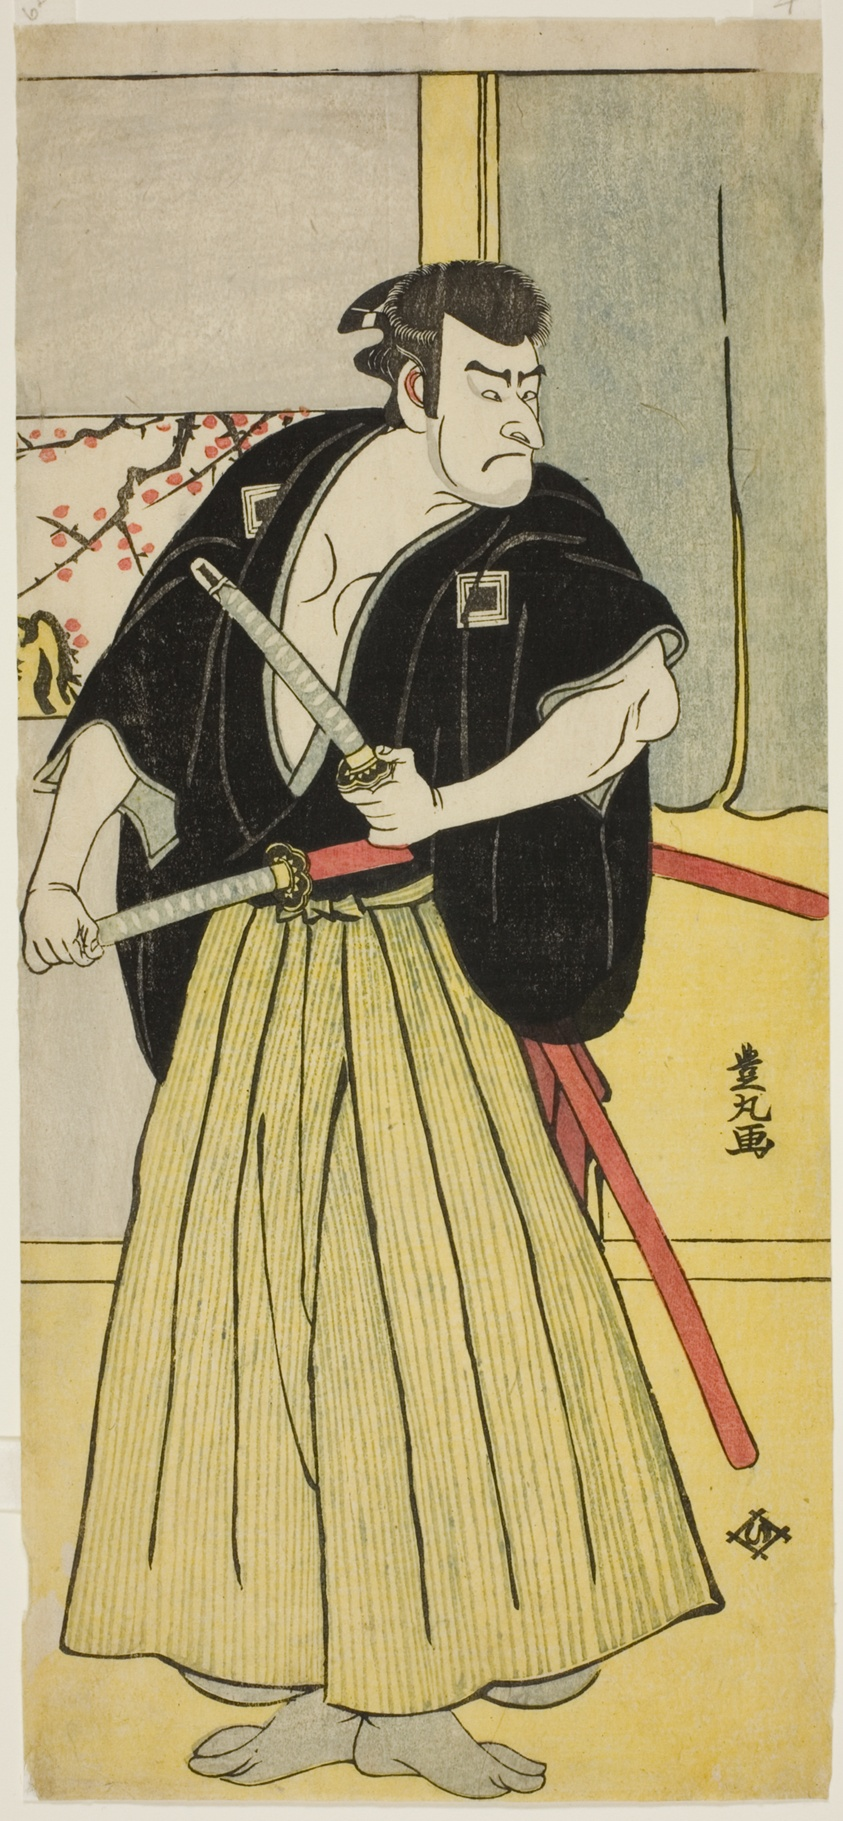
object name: Print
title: Danjuro as a Samurai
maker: Utagawa Toyomaru (Japanese, active 1785-1797)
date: about 1794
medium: Color woodblock print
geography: Japan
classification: woodblock print; print; asian art